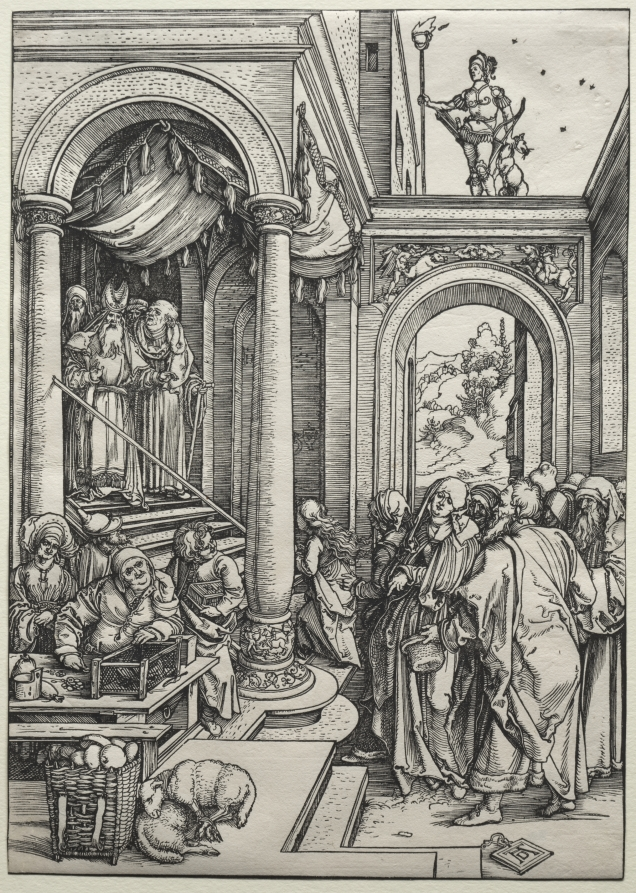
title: The Presentation of the Virgin in the Temple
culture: Germany, early 16th Century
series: The Life of the Virgin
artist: Albrecht Dürer (German, 1471–1528)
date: c. 1502–1503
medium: woodcut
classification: Print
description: Dürer devoted three woodcuts (1959.99.5-7) to the significant events in Mary’s youth prior to her sacred calling. His depiction of her birth recalls a contemporary birthing scene, complete with midwives, female friends, and relatives. Anna rests from her efforts in the background while an attendant bathes the infant Mary in the immediate right foreground. The religious significance of the event is made known by the presence of an angel above. In the subsequent prints Mary is presented several years later at the temple (running up the stairs), followed by her betrothal to an older widowed man named Joseph.